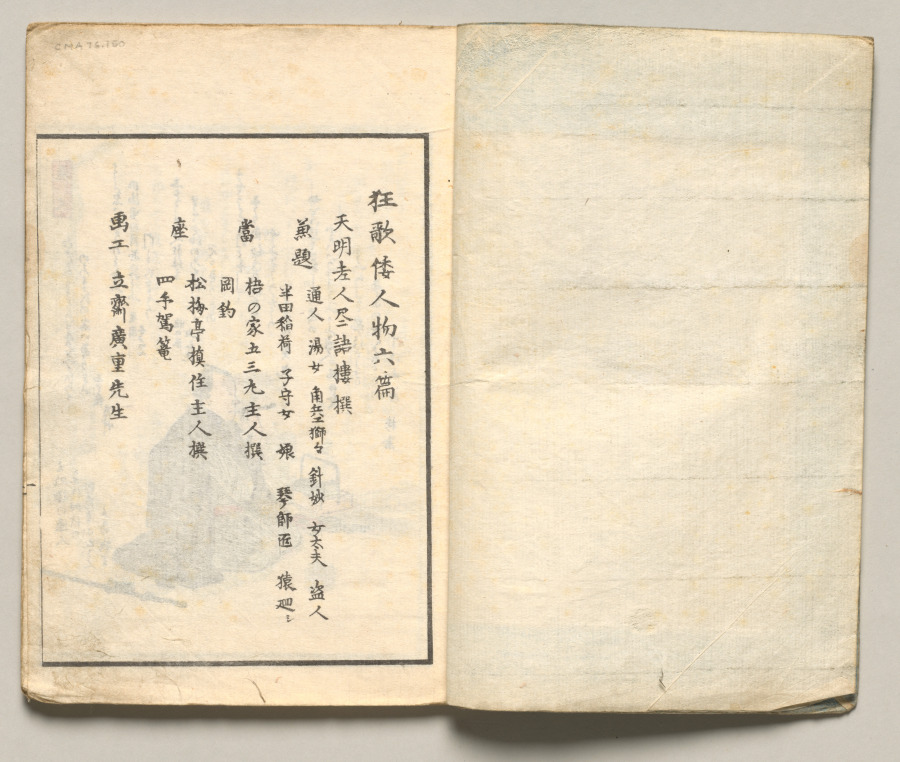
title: Spread One from Volume Six of People of Japan in Light Verse (Kyōka)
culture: Japan, Edo period (1615–1868)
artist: Utagawa Hiroshige (Japanese, 1797–1858)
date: 1857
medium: Woodblock-printed book; ink and color on paper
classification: Bound Volume